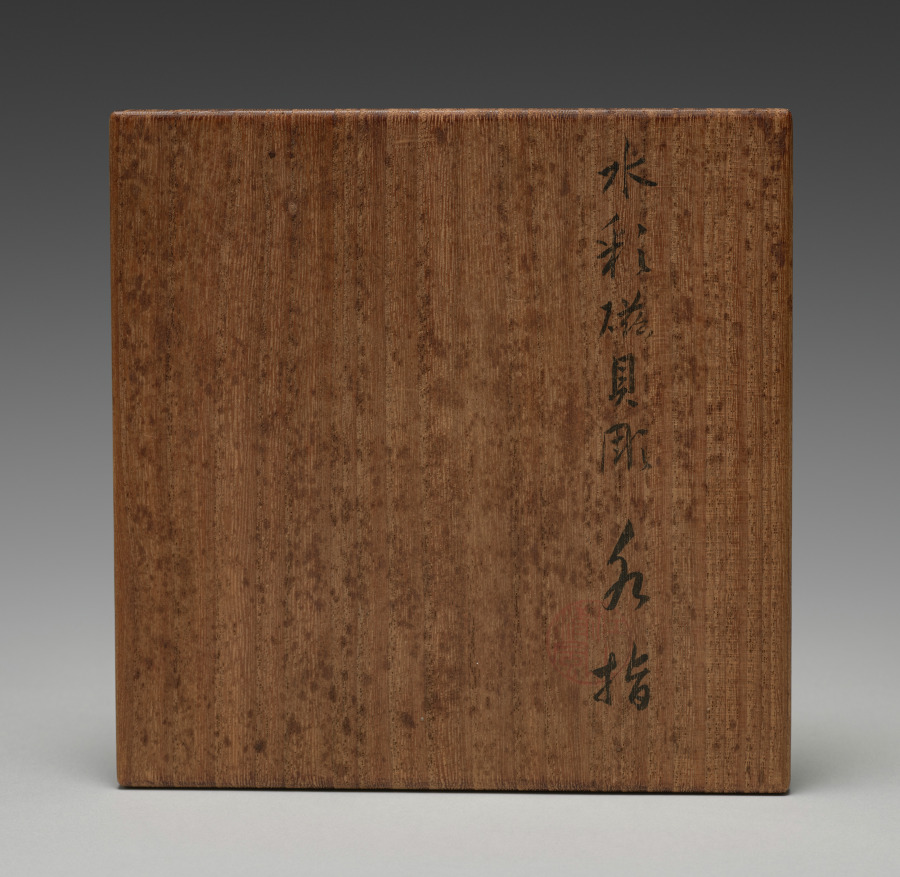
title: Water Container with Shell and Seaweed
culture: Japan, Meiji period (1868–1912) or Taishō period (1912–26)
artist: Seifū Yohei IV (Japanese, 1872–1951)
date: 1914–46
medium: Porcelain with underglaze blue, blue glaze and molded design and lacquered wood lid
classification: Ceramic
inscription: 清風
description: Yohei IV chose an aquatic theme for this mizusashi. He applied clay to the surface and molded the shape of a large conch on one side and, on the other, a clam and a scallop. The finer details he incised into the surface of his low-relief shapes. He then painted seaweed as though it were coming out from behind the sea creatures, and he further set off the animals using a masking technique with a gradated blue surround. Finally, he applied a translucent blue glaze, identified on the box as mizusai, over the entire body of the vessel. The resulting effect is that one imagines having descended through the water to the ocean floor.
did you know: A mizusashi, water container, is an essential utensil for a tea ceremony.